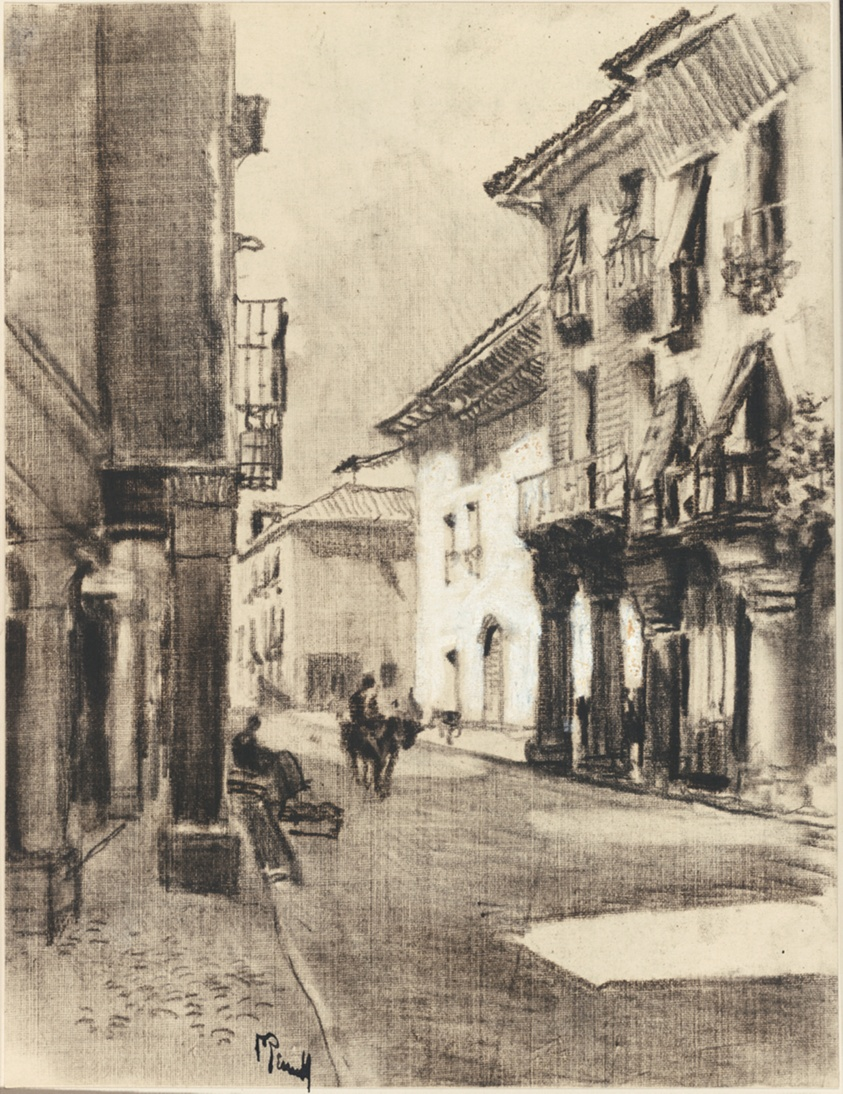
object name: Drawing and Watercolor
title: Calle Mayor Alcalá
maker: Joseph Pennell (American, 1857-1926)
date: c. 1903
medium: Oiled charcoal with stumping and erasing, with white chalk, on cream wove paper, perimeter mounted on off-white wood pulp laminate board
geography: United States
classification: charcoal; drawings (visual works); prints and drawing